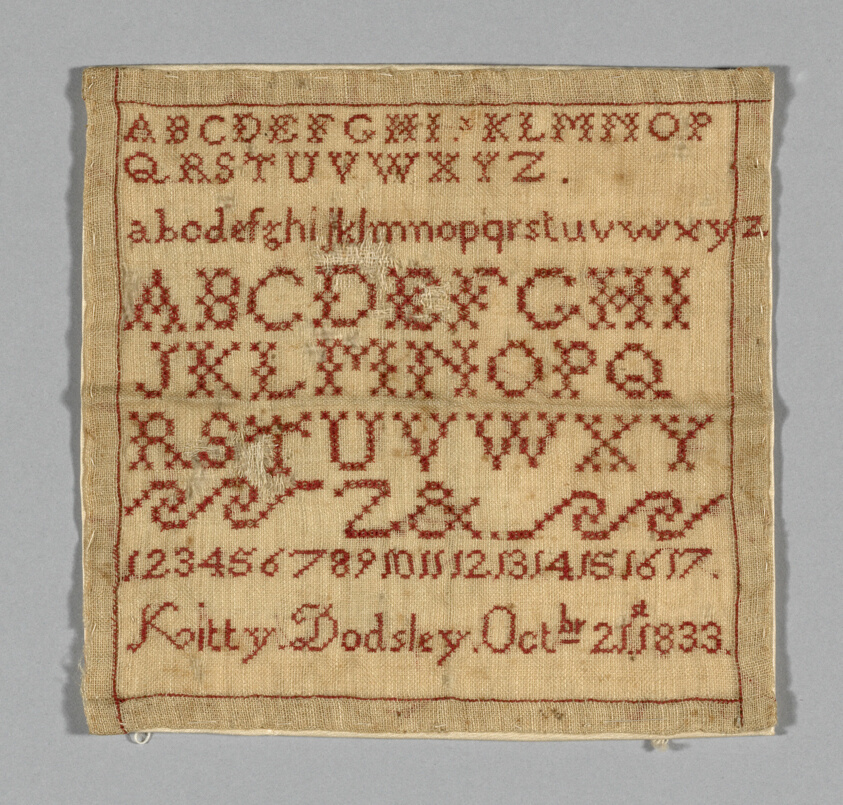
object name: Textile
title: Sampler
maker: Kitty (Dodsley) Marriot Moffatt (English, 1825-1902); England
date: 1833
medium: Tiffany cloth embroidered with red silk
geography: United States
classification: textile; needlework (visual works); sampler